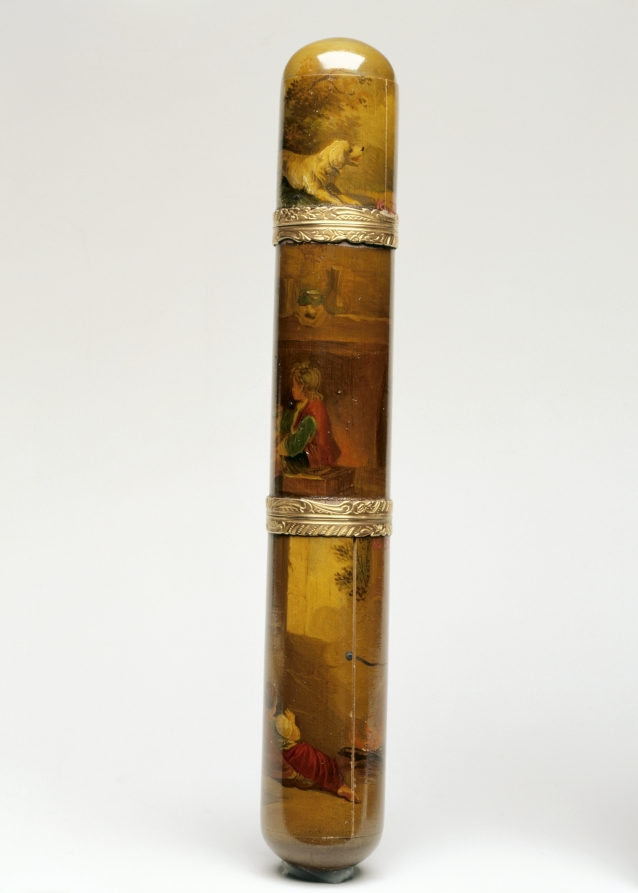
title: Perfume Case (Etui flaconnier)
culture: France, 18th century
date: c. 1780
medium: painted wood with gilt metal mounts, tortoiseshell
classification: Cosmetic Objects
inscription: Unmarked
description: Resting inside this case is a small octagonal crystal flask that would have held perfume. The painted miniatures are decorated with vernis martin, a popular varnish that imitated East Asian true lacquer. These scenes of rural merriment were often miniature reproductions of well-respected artists of the period. The depiction of three children and a dog on the lower portion of the case was drawn from Jean-Honoré Fragonard’s The Happy Family (L’heureuse fécondité) (1777).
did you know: Perfume was an important part of the French toilette, a lengthy ritual of washing and dressing practiced by members of the French social elite.